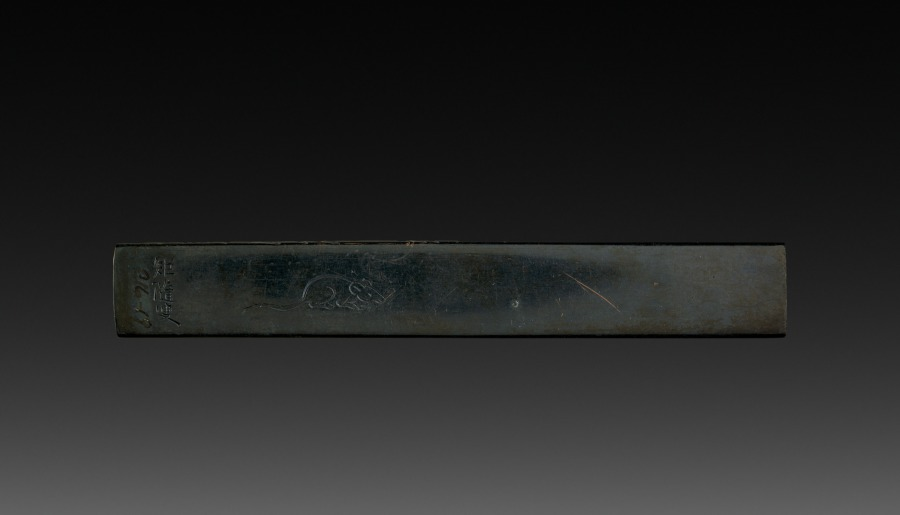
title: Knife Handle (Kozuka)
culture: Japan, Edo period (1615–1868)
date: early to mid-1800s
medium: inlaid bronze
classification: Metalwork